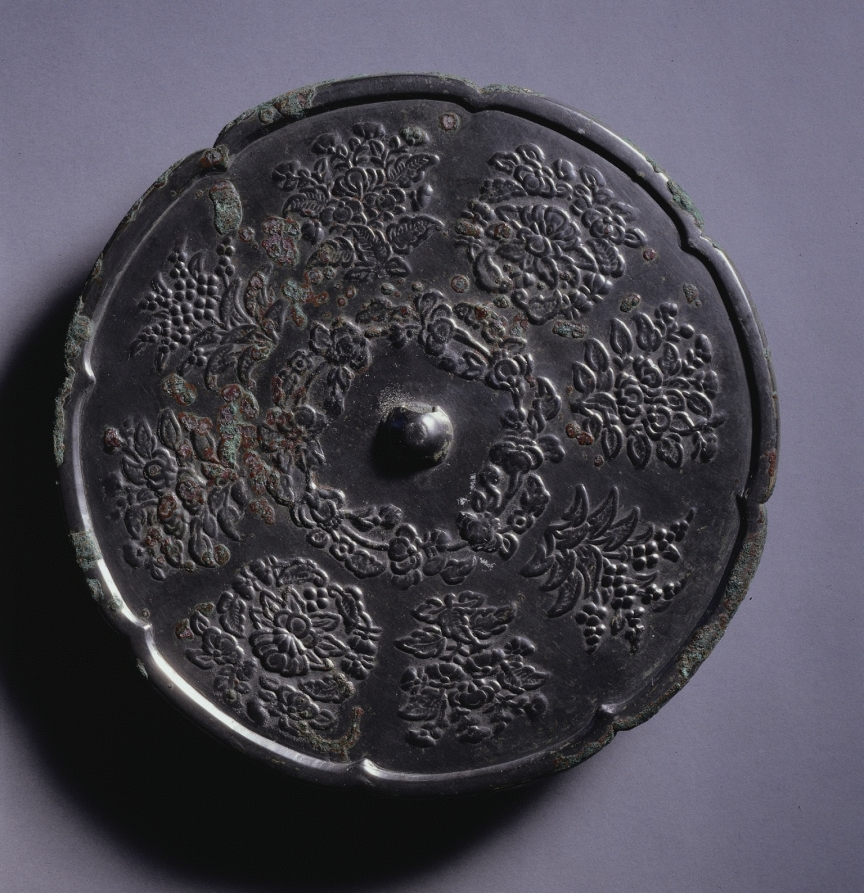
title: Lobed Mirror with Eight Blossoms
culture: China, Tang dynasty (618–907)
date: 700s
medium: bronze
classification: Metalwork